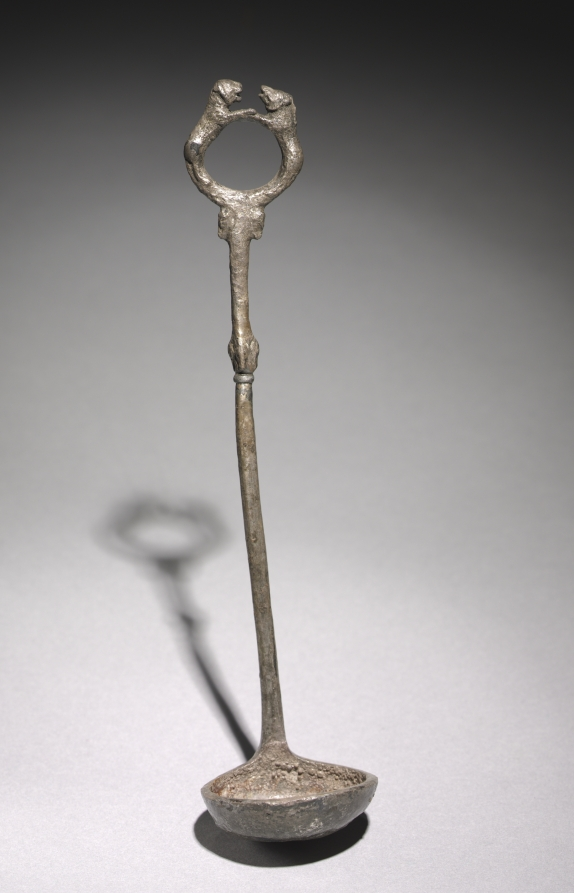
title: Ladle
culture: Syria(?), Achaemenid (550–330 BCE)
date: c. 525–450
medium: silver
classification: Metalwork